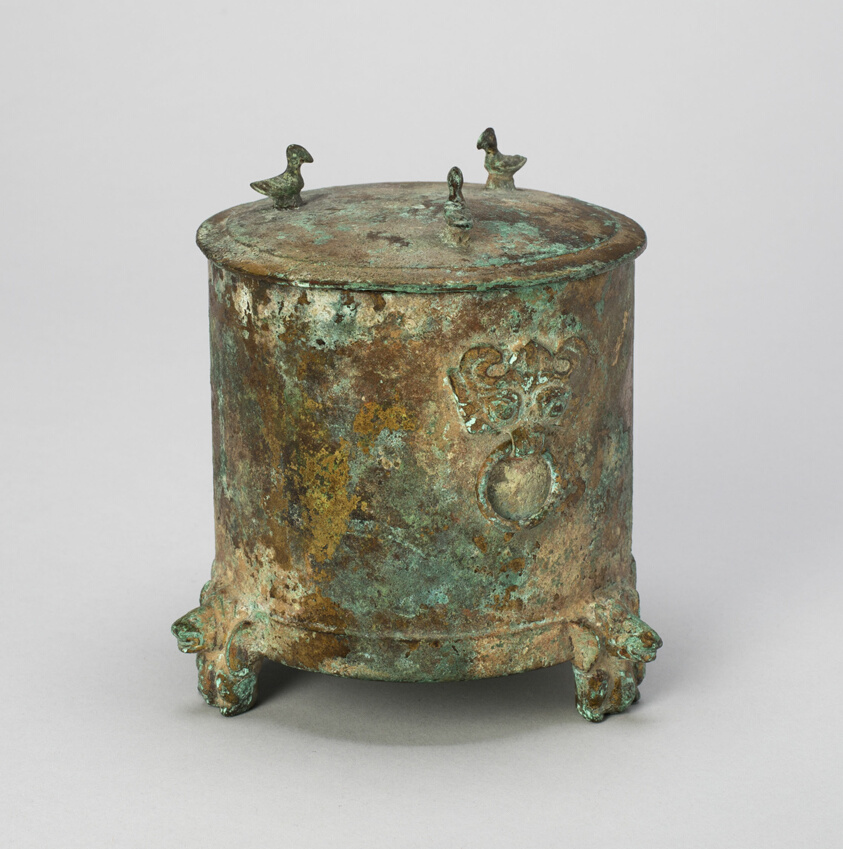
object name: Vessel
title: Wine Warmer (Zun)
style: Chinese (culture or style)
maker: China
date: Western Han dynasty (206 B.C.–A.D. 9), 2nd/1st century B.C.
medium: Gilt bronze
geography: China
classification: accessory table equipment; bronze; metalwork; asian art; vessel